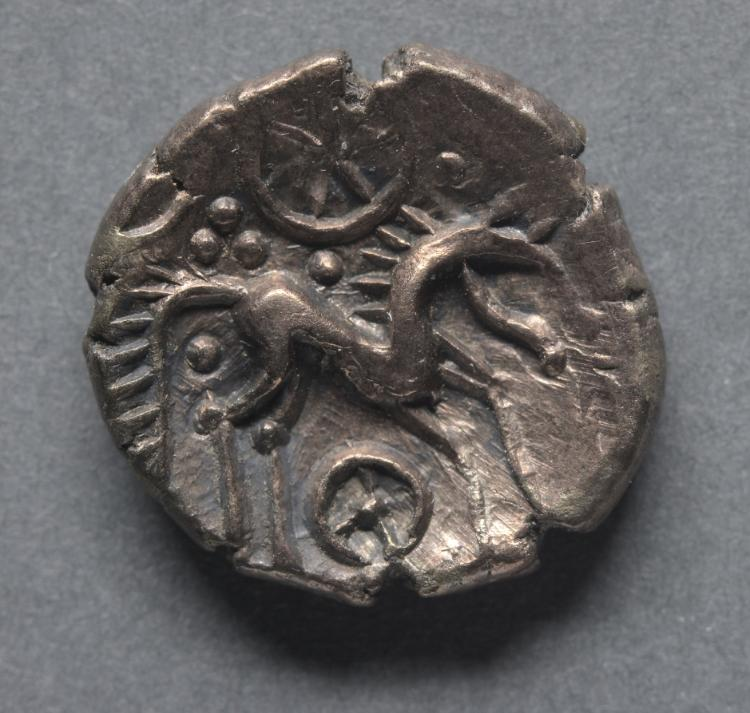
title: Stater: Horse and wheels (reverse)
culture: England, Iceni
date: 20 BCE–10 CE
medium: gold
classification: Coins